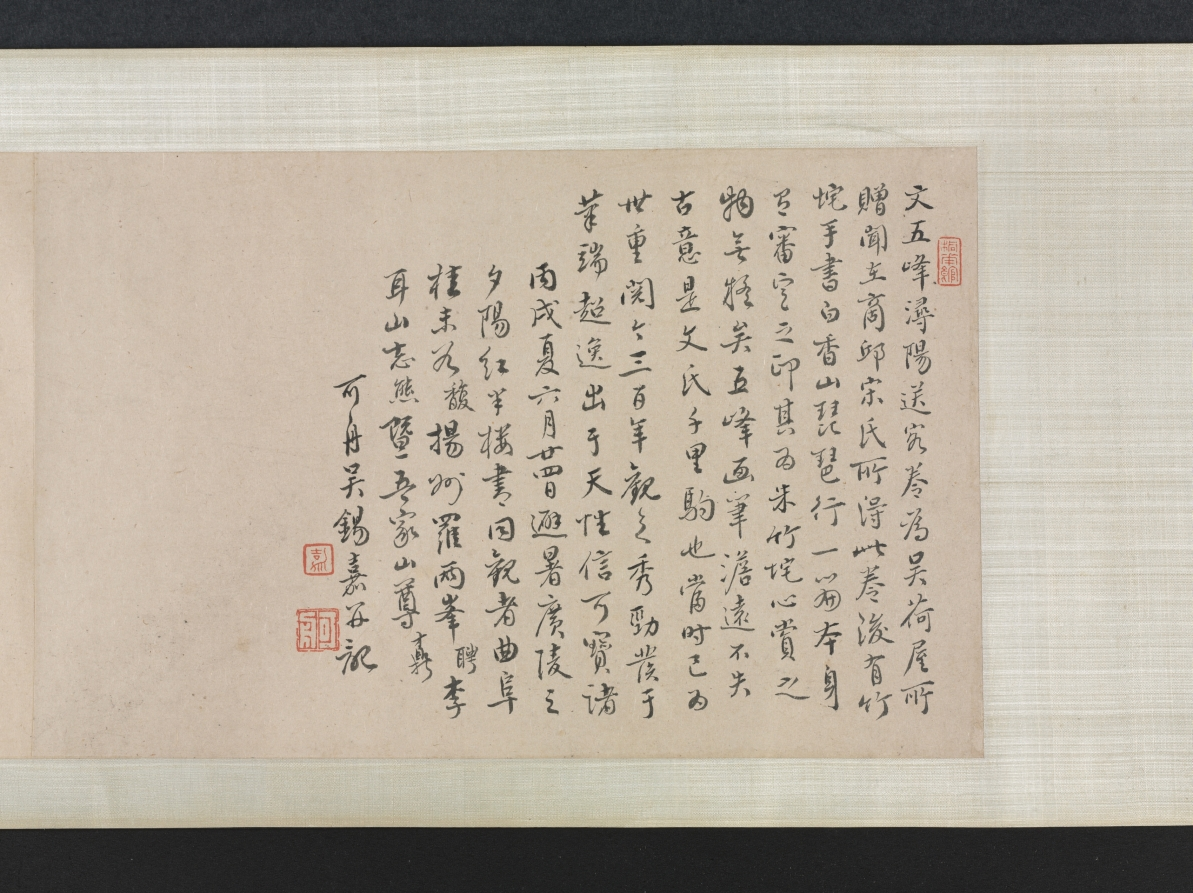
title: Saying Farewell at Xunyang (Song of the Pipa)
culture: China, Ming dynasty (1368–1644)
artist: Wen Boren (Chinese, 1502–1575)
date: 1500s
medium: handscroll, ink and color on paper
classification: Painting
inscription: "潯陽送客圖" 五峰山人文伯仁寫于停雲館中 [印] 文伯仁; 五峰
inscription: 2 colophons and 9 additional seals: 1 transcription of "Pipa xing 琵琶行” (Song of Pipa) and 3 seals of Zhu Yizun 朱彜尊 (1629-1709); 2 seals of Wu Rongguang 吳榮光 (1773-1843); 1 colophon, dated 1826, and 3 seals of Wu Xijia 吳錫嘉 (mid-1700s)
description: This handscroll depicts The Song of the Pipa, a poem by Bai Juyi 白居易 (772–846) written after the poet’s encounter with a pipa player on the Yangzi River. Expelled from her home city when her beauty and fame had faded, she played for the poet at night. Her musical performance and tragic life story resonated with Bai Juyi, who had just been demoted and exiled from life at court himself. The hazy, vast view and pale color tonalities of this painting illustrate these feelings of endless sadness, having lost one’s sense of purpose in life.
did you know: Wen Boren depicted the chilly autumn water with a fishnet pattern.